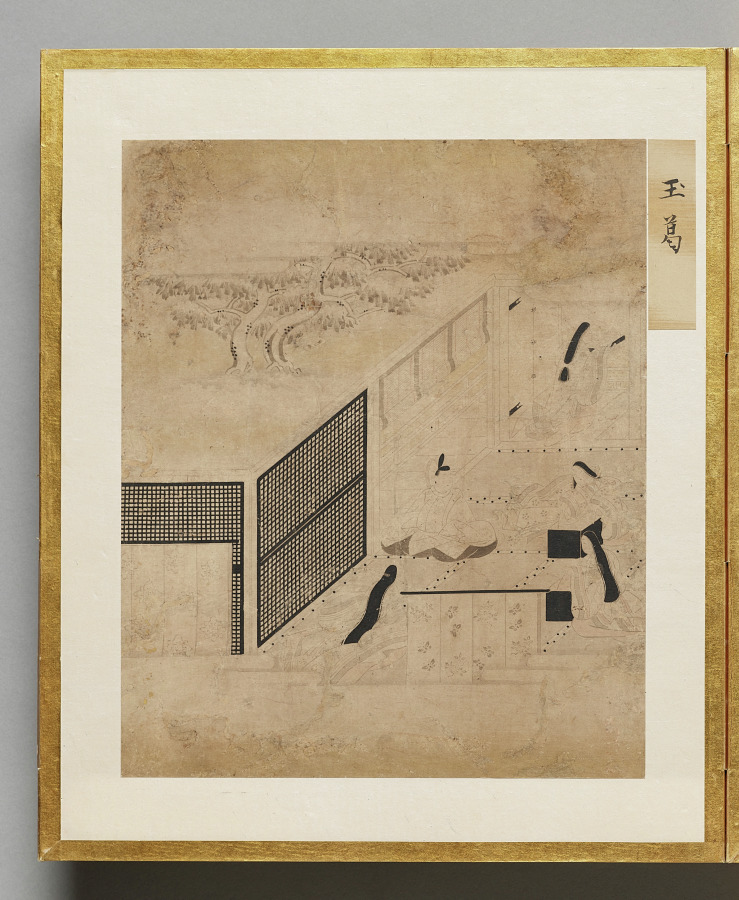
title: Jeweled Chaplet from Album of Illustrations for the Tale of Genji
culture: Japan, Edo period (1615–1868)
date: 1600s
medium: painting in an accordion-style album; ink, light color, and gold on paper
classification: Bound Volume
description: This album contains illustrations for the classic literary work the Tale of Genji, authored in the 1000s by Murasaki Shikibu, an aristocrat of the Heian period (794–1185) court. The scenes are painted in the “white drawing” (hakubyō) mode, in which a fine ink line is used to depict figures and spaces with great subtlety, punctuated only occasionally by traces of red pigment for a character’s lips, a detail of a garment, or a decorative element. These two scenes illustrate episodes from the chapters “Thin Veil of Cloud” (Usugumo) and “Barrier Gate” (Sekiya).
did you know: The illustrations are identified by chapter title in cartouches to the upper right of the paintings.